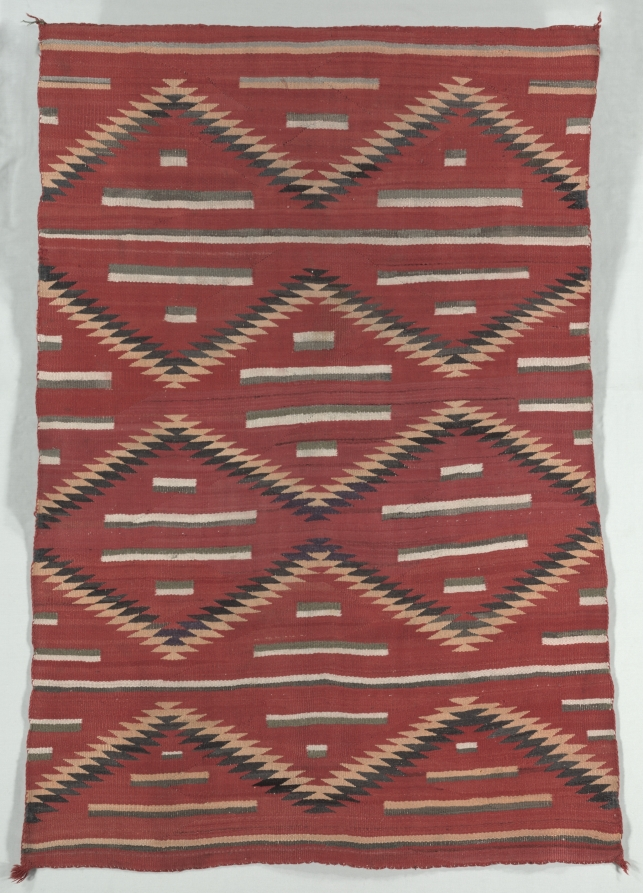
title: Eyedazzler Style Rug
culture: America, Native North American, Southwest, Navajo, Post-Contact, Transitional Period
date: c. 1890–1900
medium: tapestry weave: wool (handspun)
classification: Textile